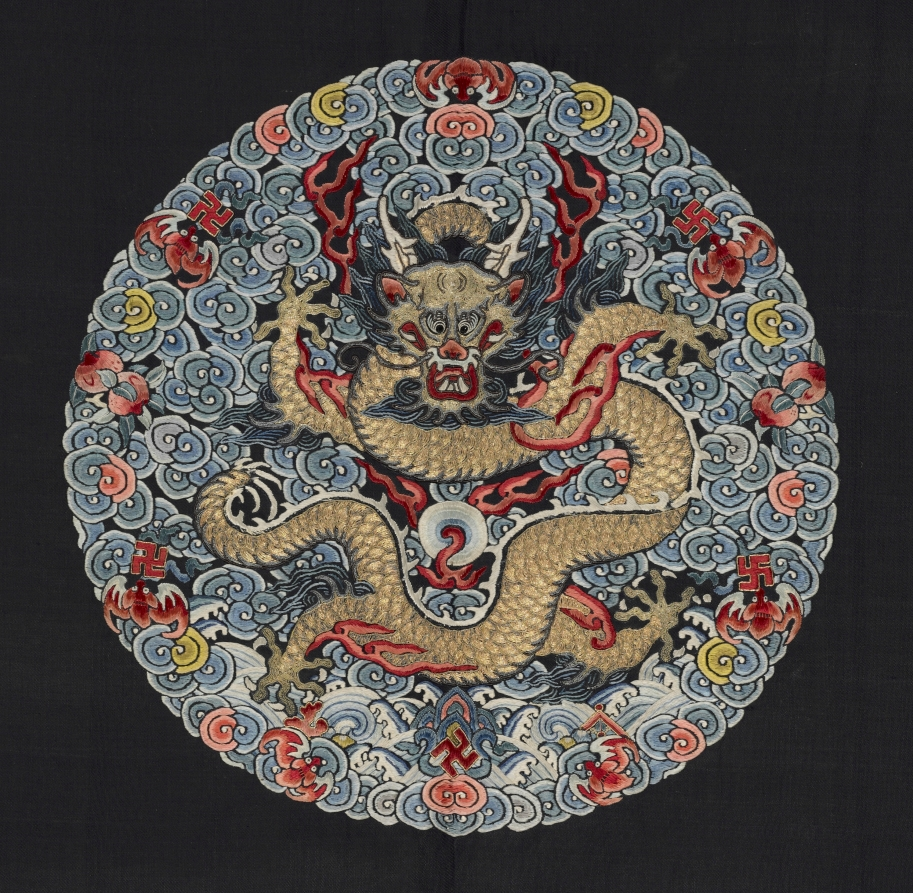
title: Unfinished robe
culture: China, Qing dynasty (1644-1911)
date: 1800–1825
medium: Silk with silk and metal thread embroidery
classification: Garment